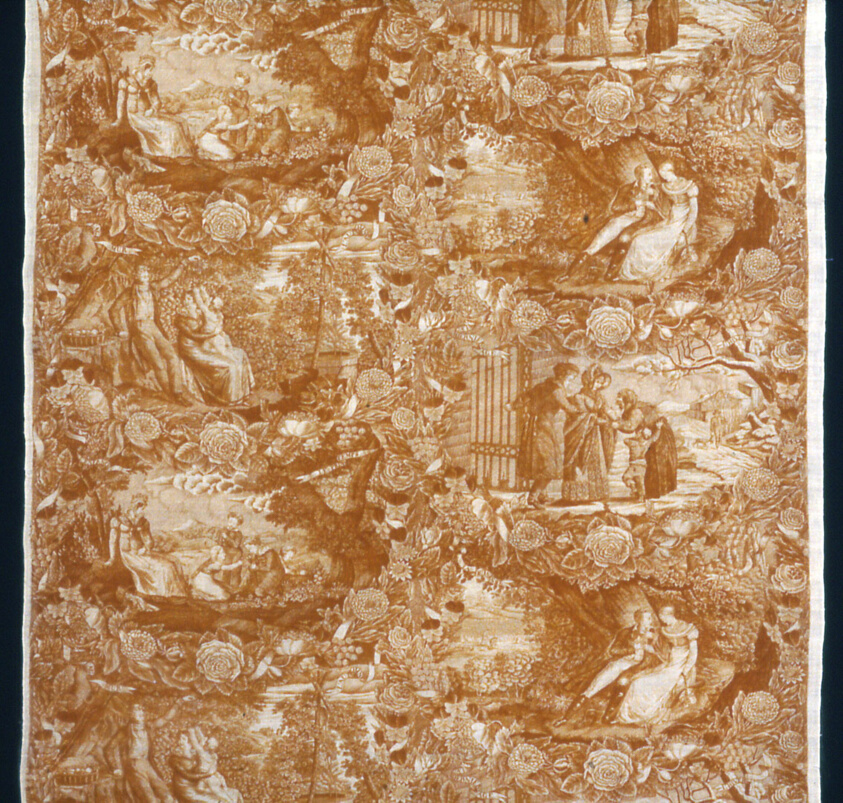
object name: Textile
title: The Seasons and the Ages of Man (Furnishing Fabric)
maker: Design attributed to Frédéric Etienne Joseph Feldtrappe (French, active c. 1820–1830's); Possibly France, Deville (near Rouen)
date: 1827/40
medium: Cotton, plain weave; engraved roller printed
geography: Rouen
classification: textile; weaving - printed; furnishing textile